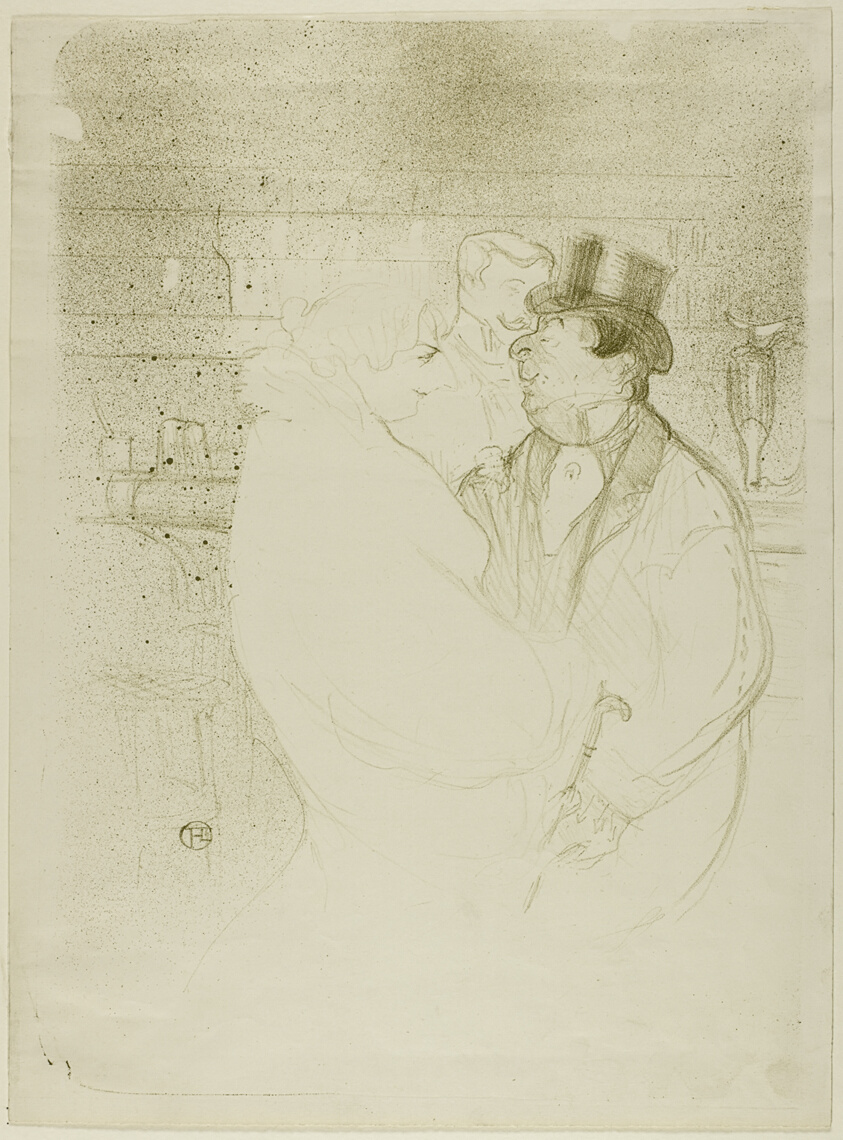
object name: Print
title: Ida Heath at the Bar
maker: Henri de Toulouse-Lautrec (French, 1864-1901)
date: 1894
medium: Color lithograph on ivory wove paper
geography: France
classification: lithograph; print; prints and drawing